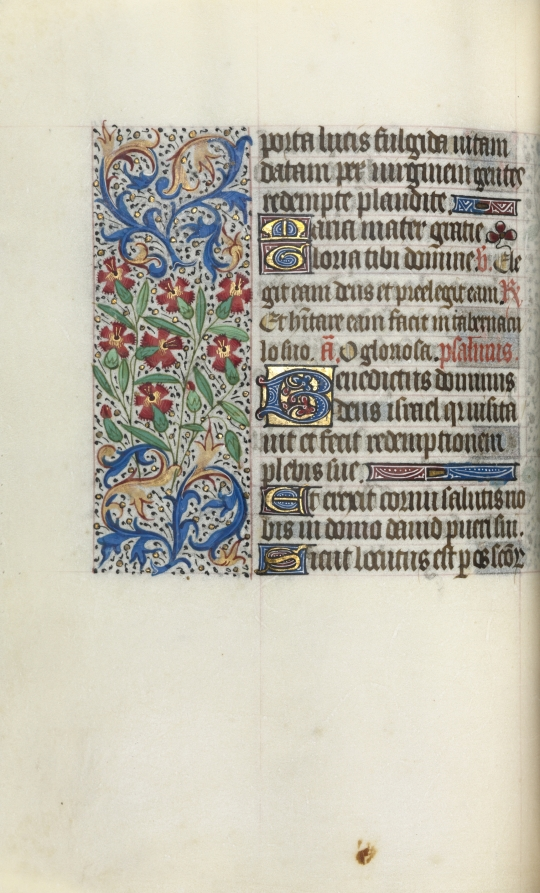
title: Book of Hours (Use of Rouen): fol. 47v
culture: France, Rouen, 15th century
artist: Master of the Geneva Latini (French, active Rouen, 1460–80)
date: c. 1470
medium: ink, tempera, and gold on vellum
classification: Bound Volume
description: In the late 1400s and early 1500s Rouen was an established and important center of book production. The city’s cathedral had a wealthy chapter that spent large sums of money to commission books and to maintain its extensive library. The stationers and booksellers would have likely been concentrated in or near the cathedral precinct. This artist, named after a manuscript now in Geneva, was Rouen’s principal illuminator during the second half of the 1400s.